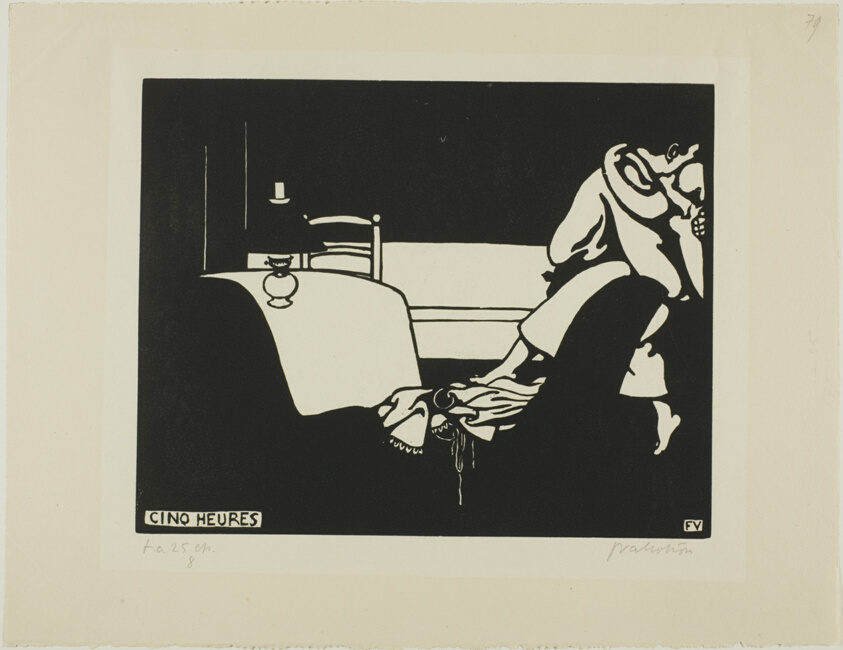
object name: Print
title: Five O'Clock, plate seven from Intimacies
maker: Félix Edouard Vallotton (French, born Switzerland, 1865-1925); published by La Revue blanche (French, 19th-20th century)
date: 1898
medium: Woodcut in black on cream wove paper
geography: France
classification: woodcut; print; prints and drawing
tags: love